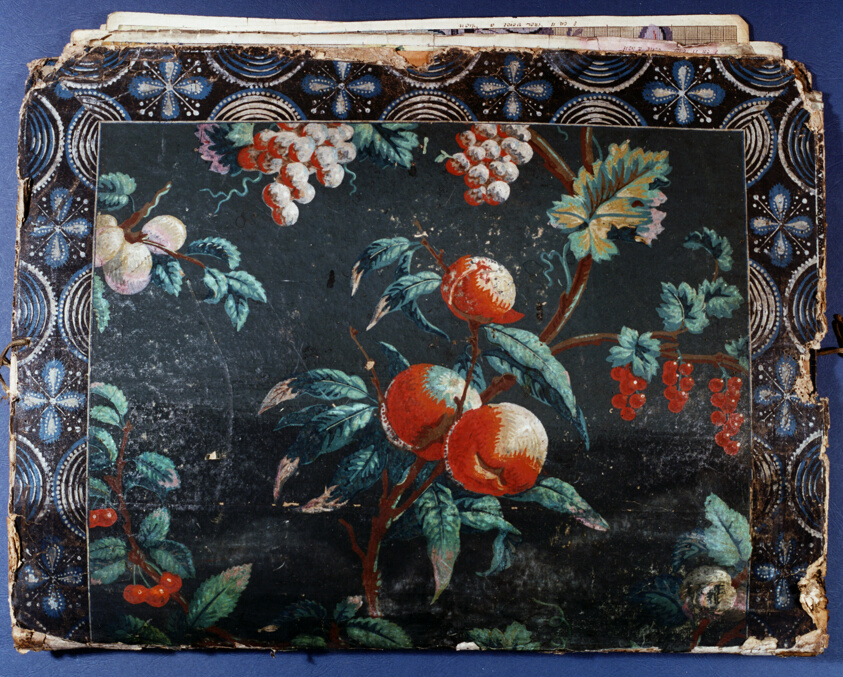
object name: Drawing and Watercolor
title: Portfolio Cover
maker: France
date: 1760/90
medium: Cardboard; painted with gouache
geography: France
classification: textile; accessory - paper design